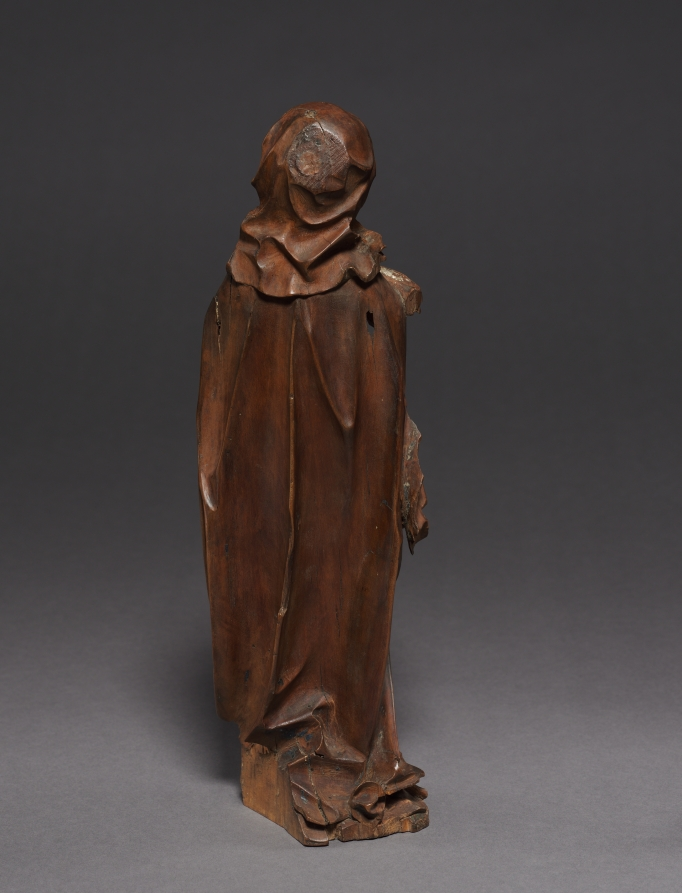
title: Mourning Virgin from a Crucifixion Group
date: about 1620/40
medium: pearwood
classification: Sculpture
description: This statuette once formed part of a Crucifixion group intended for a domestic shrine or chapel. Such ensembles were not only used for private devotion and meditation, but were also collected as works of art. This work was long attributed to the Nuremberg artist Veit Stoss. In fact, the carver imitated forms from his repertoire. However, the concave folds do not occur before 1600. The sculpture was created at a time when the appreciation for Albrecht Dürer, the most famous German painter of his time, was also experiencing a renaissance.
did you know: Looking closely, you can see that the sculptor carved tears under Mary's eyes. They show her pain over Christ hanging on the cross.